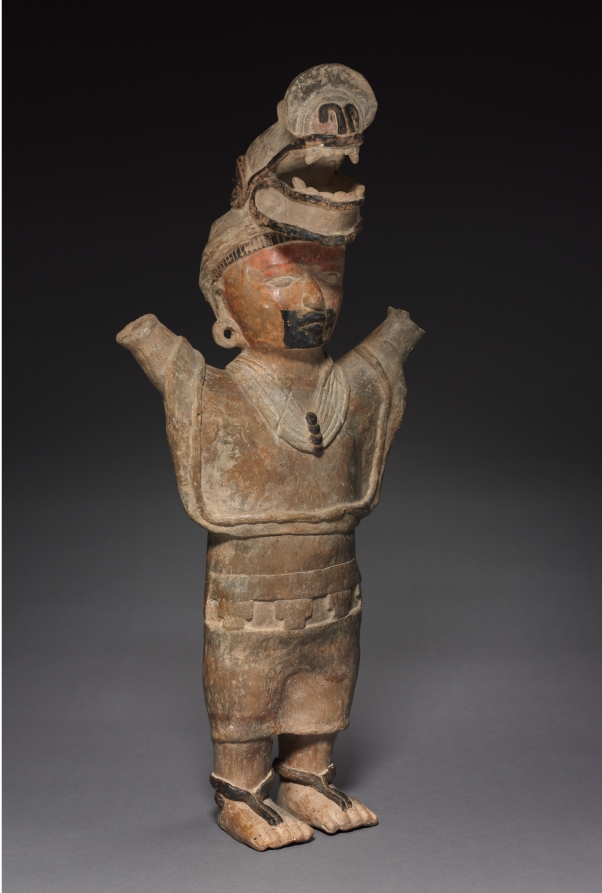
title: Standing Female Figure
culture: Mexico, Veracruz, Veracruz Monumental Sculpture type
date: 600–900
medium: burnished pottery with orange slip, traces of red and white pigment, and asphalt paint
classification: Sculpture